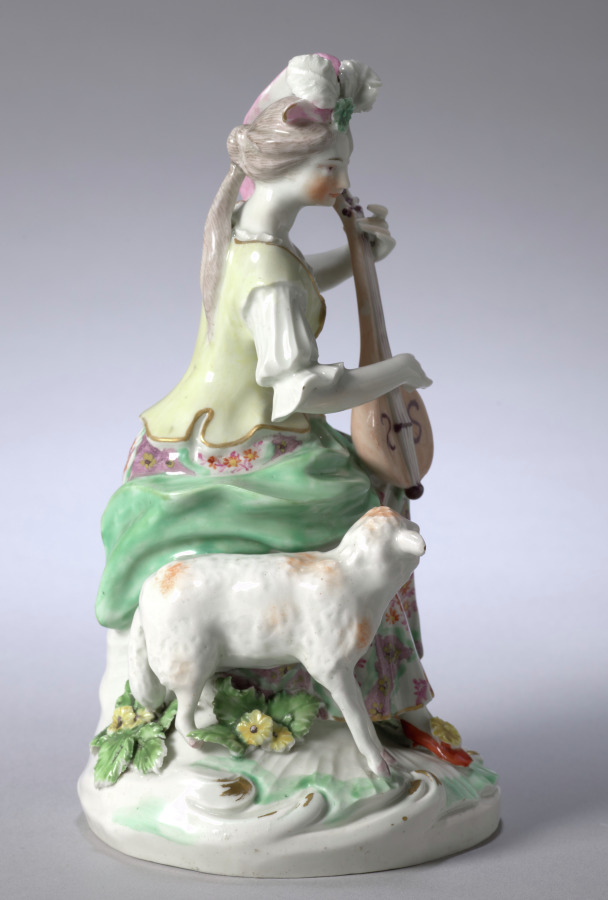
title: Seated Musician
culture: England, Derby, 18th century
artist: Derby Porcelain Factory (British)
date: c. 1765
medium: soft-paste porcelain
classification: Ceramic